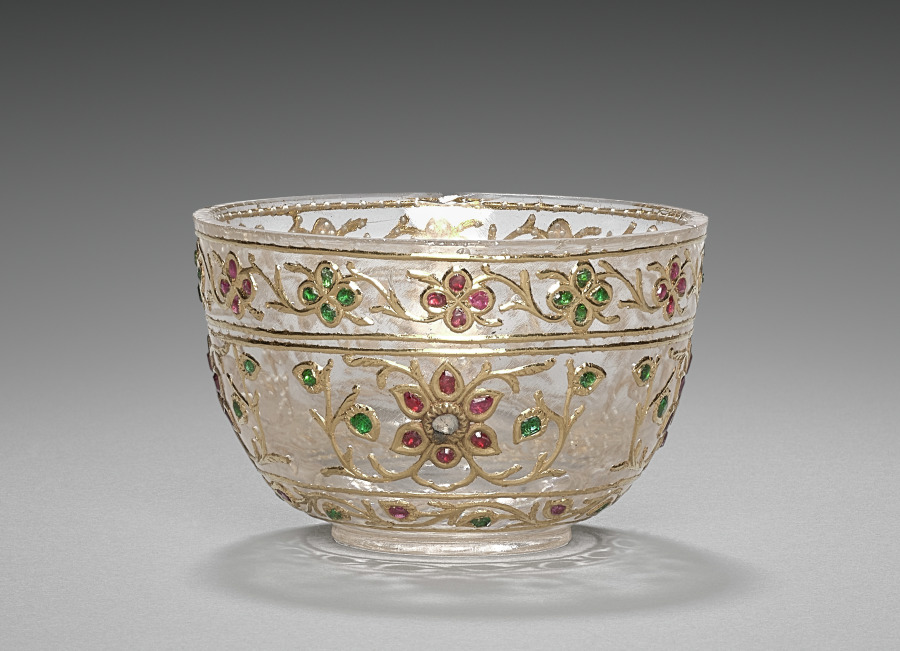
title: Jar with Cover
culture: India, Jeypore, Moghul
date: 18th Century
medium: crystal set with gold and jewels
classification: Jewelry